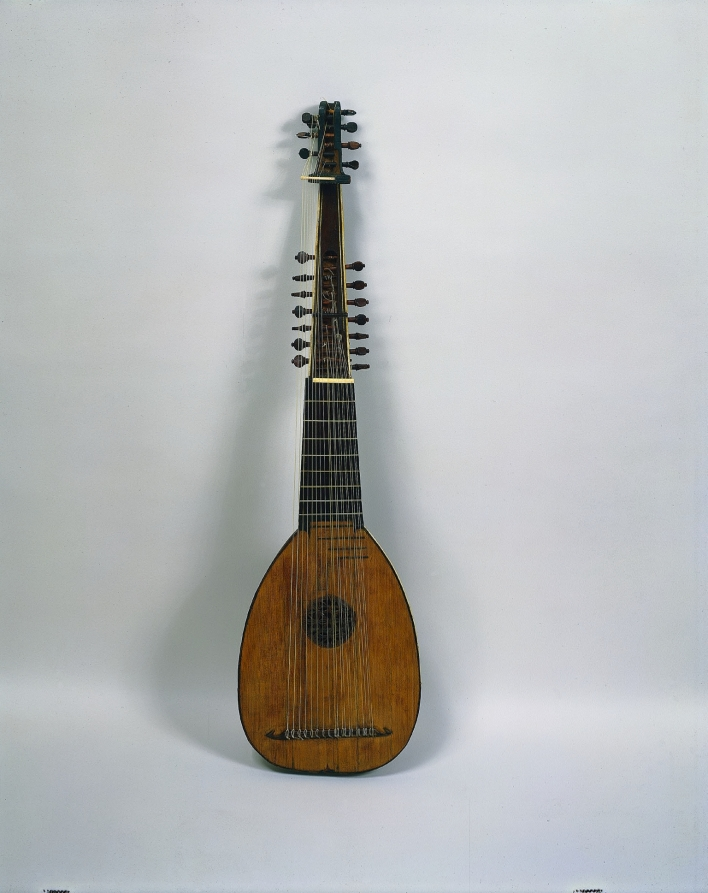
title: Lute or Tiorbino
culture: Italy, probably made in the mid-17th century, but modified by later repair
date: c. 1620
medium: wood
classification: Musical Instrument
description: The lute was the most important musical instrument in secular settings throughout the 16th and 17th centuries. Not only a virtuoso instrument with a huge repertoire, the lute provided the ideal accompaniment for the voice, played an essential role in ensembles, figured in masques and operas, and was played by amateurs as well as professionals. A highly specialized instrument, this tiorbino is a type of long-necked lute resembling a theorbo, but significantly smaller and pitched an octave higher. An object of great rarity, it is one of the smallest Baroque tiorbinos to survive.